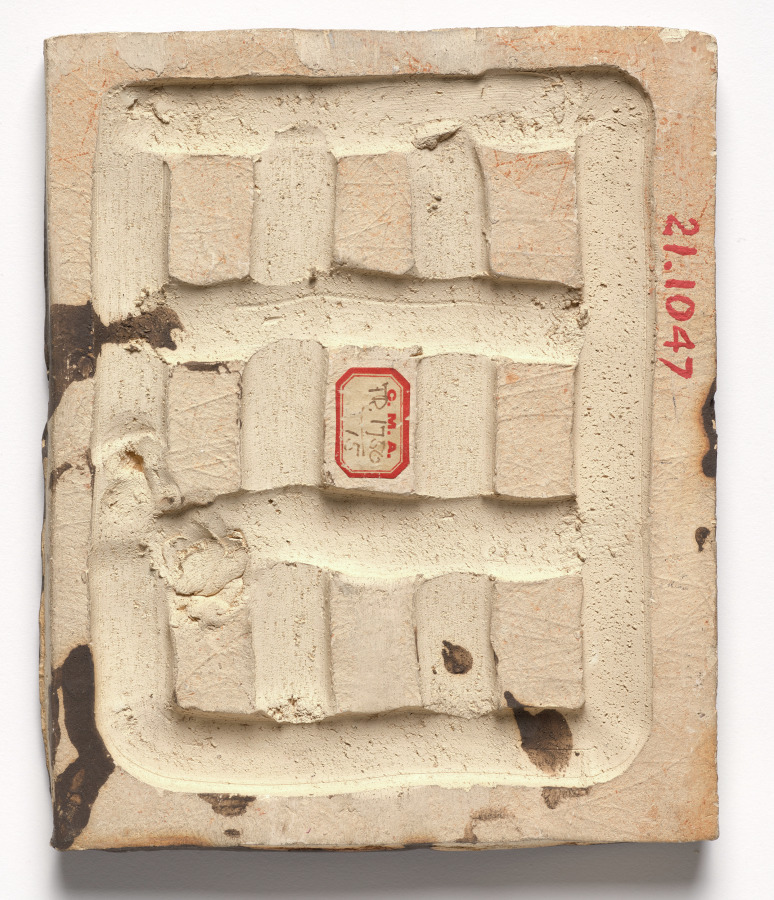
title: Tile- Bird Amid Foliage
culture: America, Pennsylvania, Doylestown, Early 20th century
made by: Moravian Pottery and Tile Works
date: before 1921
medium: unglazed ceramic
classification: Ceramic